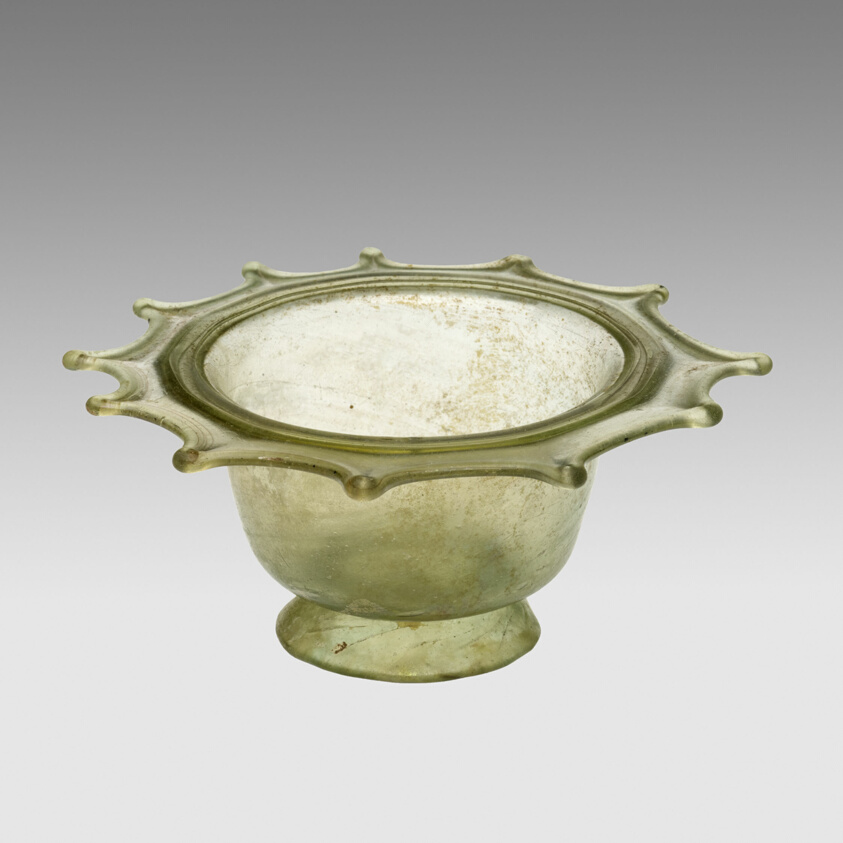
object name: Vessel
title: Bowl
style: roman (ancient, style or period), syrian, ancient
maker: Late Roman or Byzantine; Eastern Mediterranean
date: 4th-5th century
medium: Glass, blown technique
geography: Syria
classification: bowl; glass; vessel; ancient art; container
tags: bowl, dining, drinking